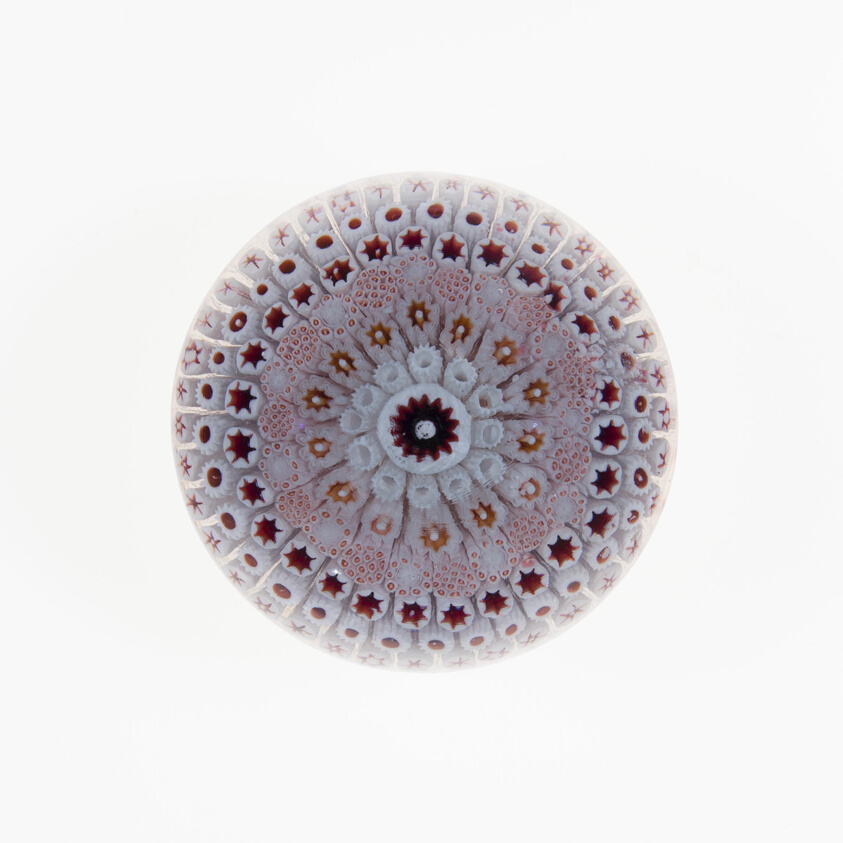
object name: Glass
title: Paperweight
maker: George Bacchus and Sons; Birmingham, England, c. 1817-1882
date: c. 1848–55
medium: Glass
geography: Birmingham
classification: paperweight; millefiori; european decorative arts; glass